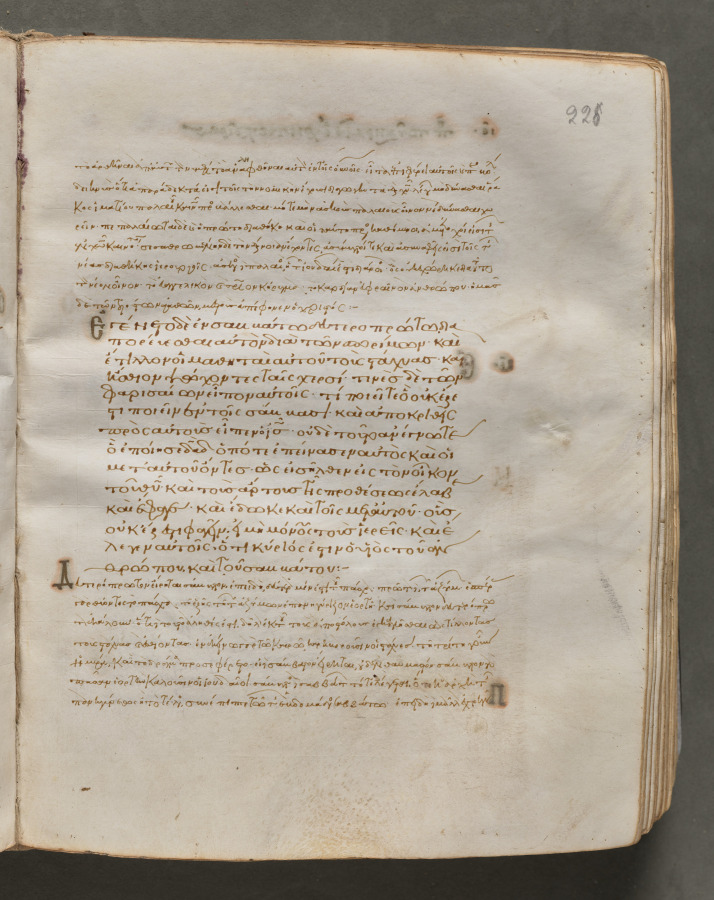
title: Text, folio 226 (recto), from a Gospel Book with Commentaries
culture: Byzantium, Constantinople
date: c. 1000–1100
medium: ink, tempera, and gold on vellum; leather binding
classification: Bound Volume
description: Each of the four gospels in this book opens on a page with brilliantly illuminated borders depicting the author of the text as well as birds-principally peacocks, symbols of the immortality of the soul-and fountains, representing the fountain of life and the salvation of the soul. This volume consists of 428 leaves with texts in Greek. Its level of sophistication suggests that it was probably written and decorated in a monastery in Constantinople.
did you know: Gospel Books were carried in procession through Byzantine churches.